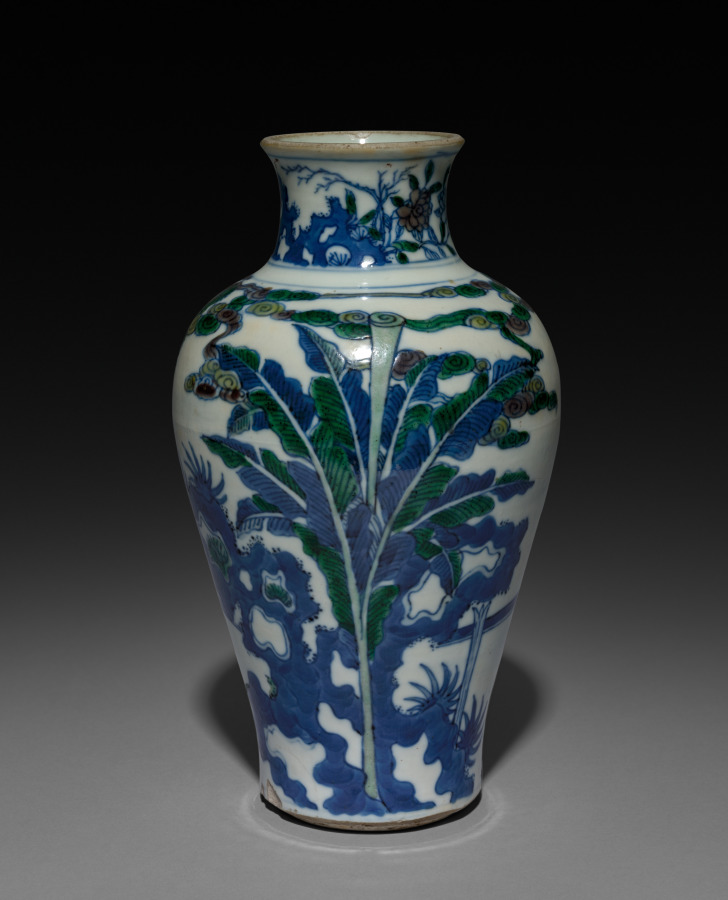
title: Vase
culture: China, Jiangxi province, Jingdezhen kilns, Ming dynasty (1368-1644), Wanli reign (1572-1620)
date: 1573–1620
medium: porcelain with underglaze blue decoration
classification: Ceramic